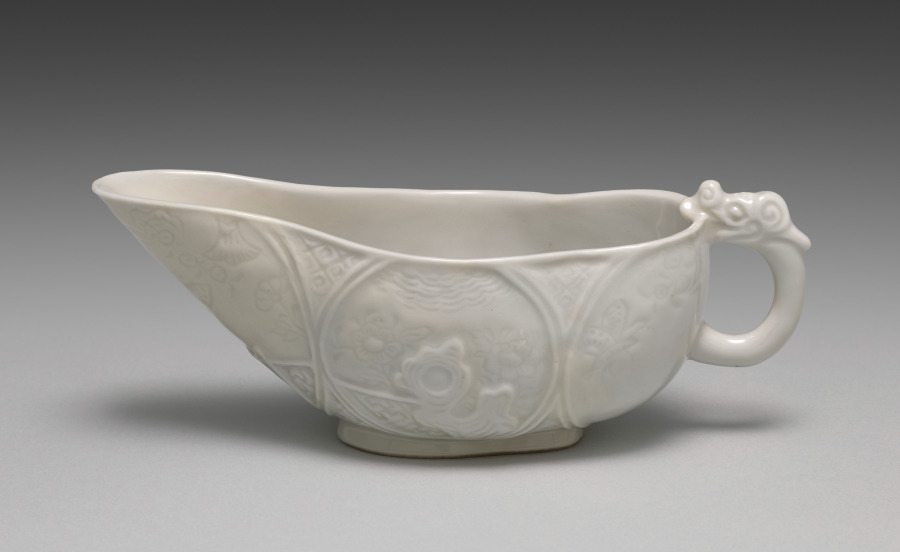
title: Water Cooler with Chinese Gardens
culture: Japan, Meiji period (1868–1912)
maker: Seifū Yohei III (Japanese, 1851–1914)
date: 1893–97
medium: Porcelain with molded and carved designs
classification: Ceramic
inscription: Artist's seal beneath the handle.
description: Unlike most pieces by the Seifu Yohei studio, this one bears a seal beneath the handle rather than on the base. The glaze and technique are identified on the box as taihakuji, or “great white porcelain,” an important early invention Yohei III devised in 1872 that involved the combination of a distinctive translucent, creamy glaze over an ivory-colored clay body. The body’s two sides have garden scenes seen through windows. Designs of flowers and butterflies are incised in the spaces at both ends. The garden on the right-hand side of the vessel, seen through a round window, has a decorative rock with grasses beneath a cloudy sky; and on a tiled veranda, there is a teapot as well as a fan and two scrolls inserted into a double-handled urn or kettle atop a brazier. The garden on the left-hand side has two enormous flowers below what may be either a cloud or a rippling pond; a garden rock—or perhaps a carved wood sculpture—with a circular perforation sits on what appears to be a veranda. While the details may be open to interpretation, the setting is a rather glamorous Chinese residence or palace with a superbly tended garden in spring or summer.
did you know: This water cooler has a handle with a dragon head.